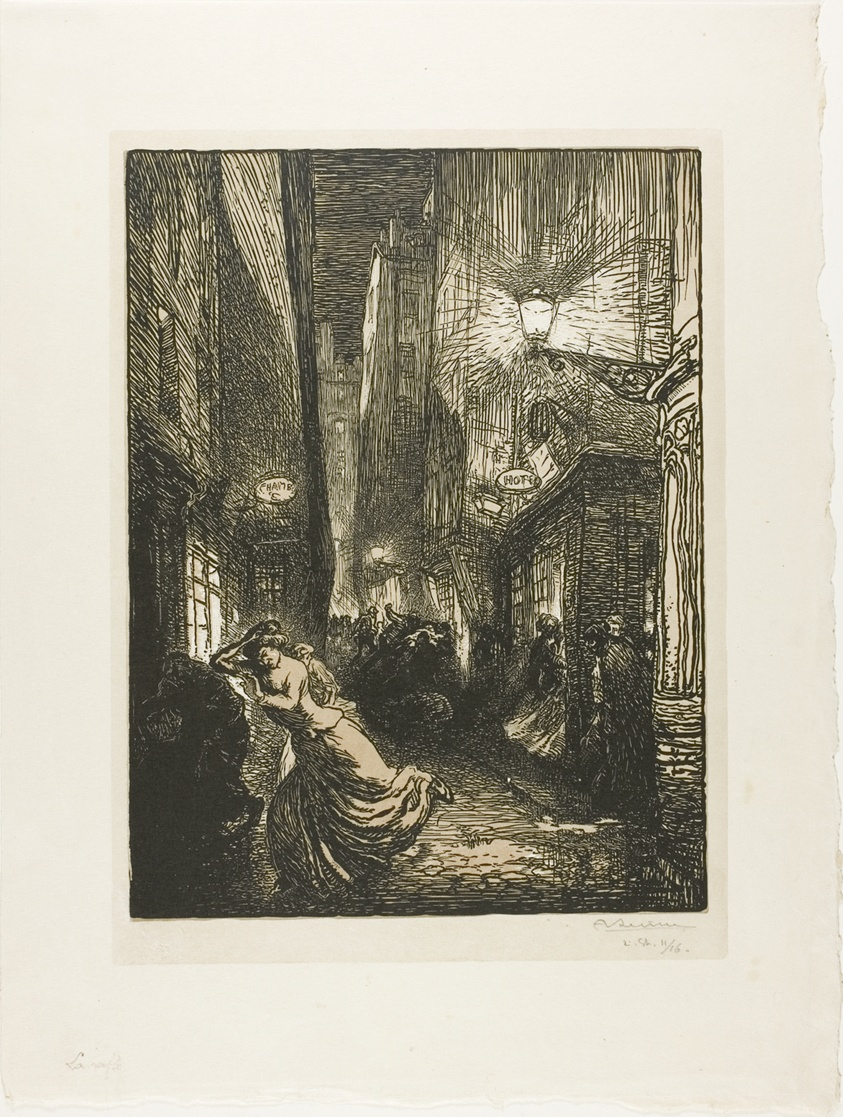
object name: Print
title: The Raid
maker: Louis Auguste Lepère (French, 1849-1918)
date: 1910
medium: Woodcut in dark gray-tan, light gray-tan and black on cream wove Japanese paper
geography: France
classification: woodcut; print; prints and drawing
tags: prostitutes, people, prints and drawings